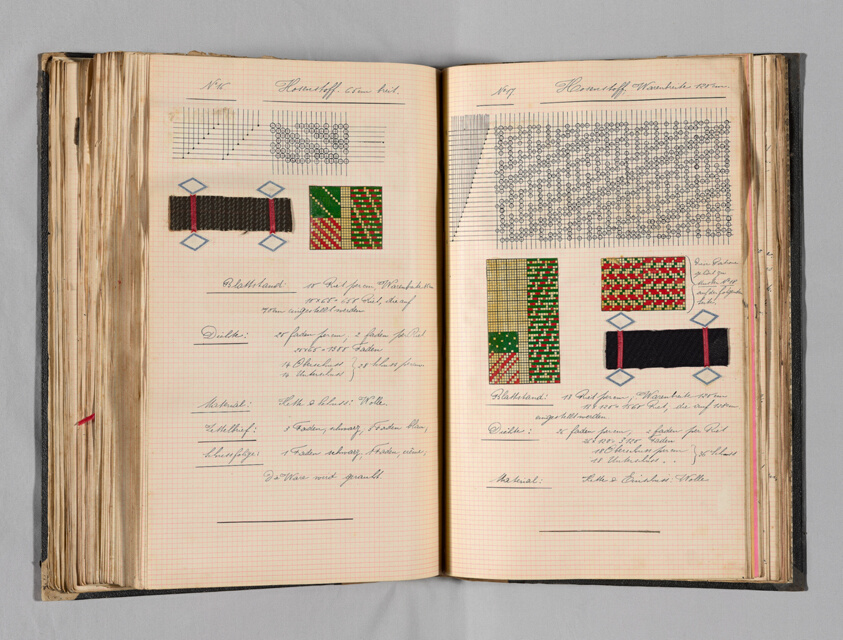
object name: Book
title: Student Notebook Containing Notes, Diagrams and Swatches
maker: Alfred Fehr (Switzerland, 1879-1955)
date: c. 1898–1900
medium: Bound notebook of technical notes and weave samples: fabrics for clothing and mixed goods, ribbed and twill cottons, and jacquard; 176 pages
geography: Germany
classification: book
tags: weaving, diagrams